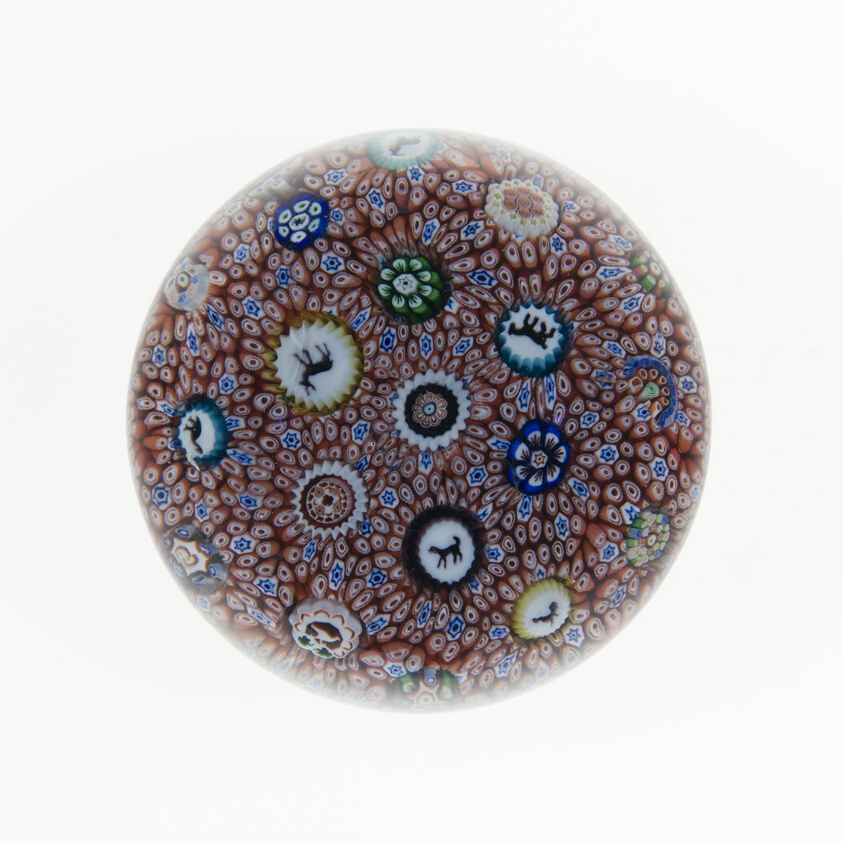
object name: Glass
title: Paperweight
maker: Baccarat Glassworks (Cristalleries de Baccarat); Lorraine, France, founded 1764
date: 1848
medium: Glass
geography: Lunéville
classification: paperweight; millefiori; european decorative arts; glass